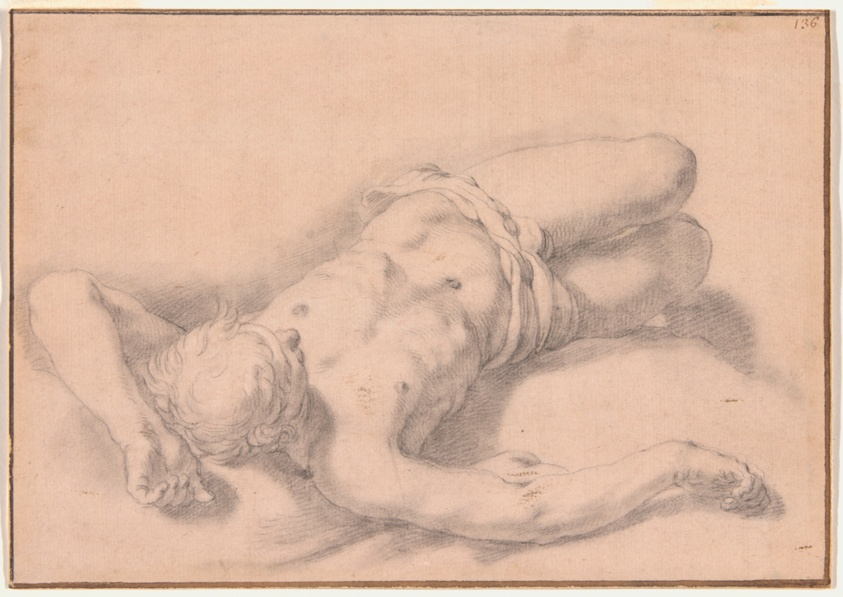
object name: Drawing and Watercolor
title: Study of a Nude Man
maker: Abraham Bloemaert (Dutch, 1566-1651)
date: 1645–51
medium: Black chalk on buff laid paper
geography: Holland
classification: chalk; drawings (visual works); prints and drawing